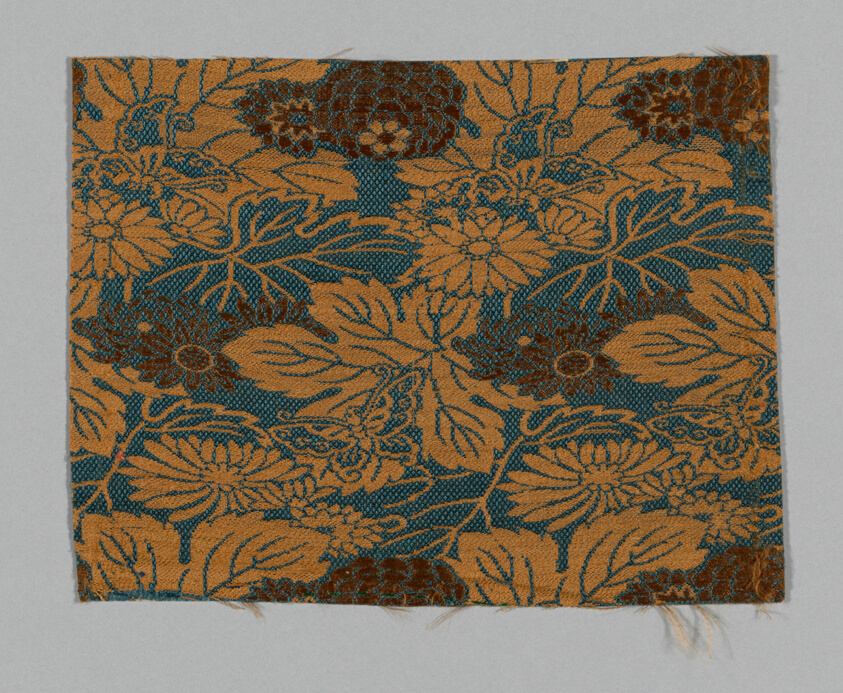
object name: Textile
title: Fragment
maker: Japan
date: Meiji period (1868–1912), 1875/1900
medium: Silk, plain weave with supplementary patterning warps and supplementary patterning wefts bound by secondary binding warps in plain interlacings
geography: Japan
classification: textile; weaving